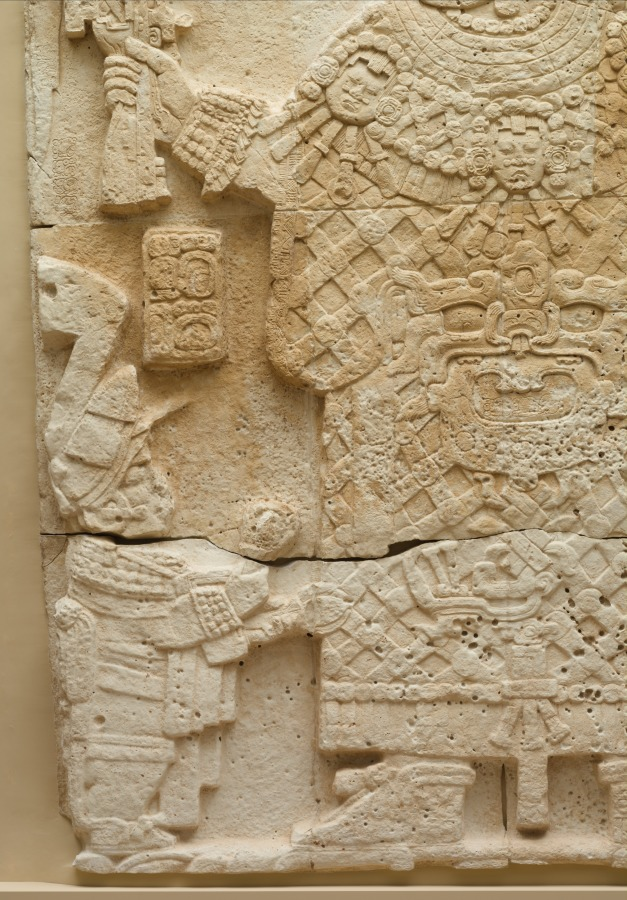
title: Front Face of a Stela (Free-standing Stone with Relief)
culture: Mesoamerica, Guatemala, Department of the Petén, El Perú (also known as Waka'), Maya (250-900), Classic period (200-1000)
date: 692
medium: limestone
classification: Sculpture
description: In stone sculpture, Maya rulers celebrated the milestones of their reigns with flamboyant portraits like this image of a royal woman, created to mark the passage of a twenty-year period known as the k’atun. She originally stood in a plaza next to a portrait of her spouse (see photo), with whom she ruled El Perú-Waka’, a provincial Maya town. A member of the powerful dynasty of a nearby Maya center, she seems to have held higher authority than her husband, serving as a military governor. Her costume reflects her status: the headdress has a fan of green quetzal feathers and her jewelry probably refers to jade-both among the most prized of ancient materials. Jade beads also may form the net over her garment, belted with the head of a fish-like creature. Completing the costume are the scepter and shield she grasps in her hands. The dwarf at her side may be a court attendant. The hieroglyphic text refers to important dynastic dates.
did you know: The powerful Maya queen shown on this stela is known as Lady K’abel.